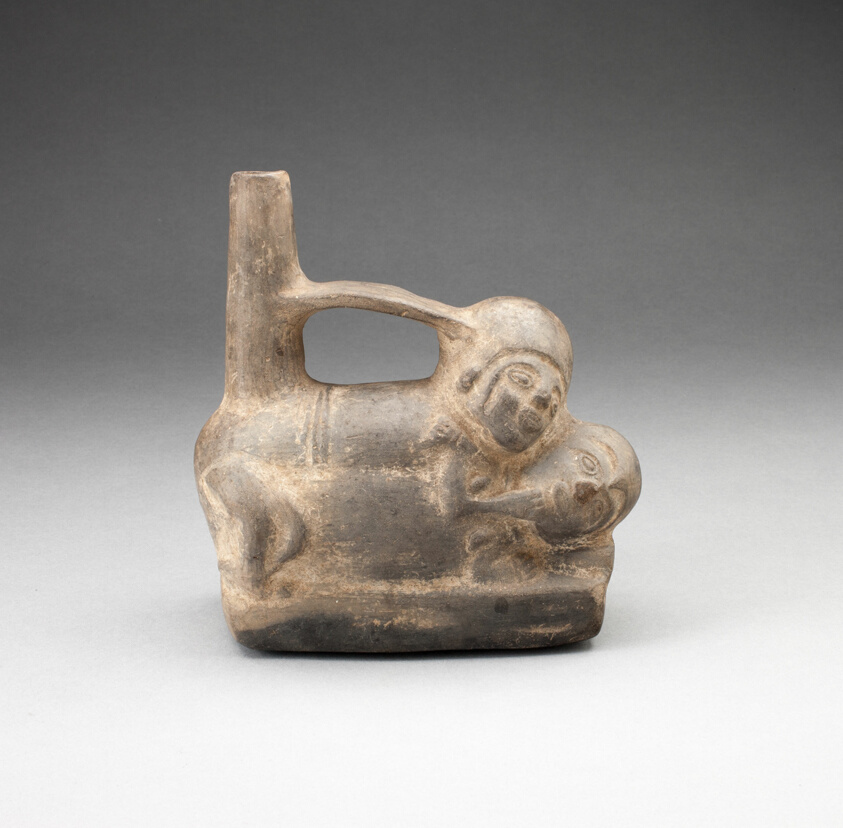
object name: Vessel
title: Stirrup Spout Vessel Depicing Erotic Scene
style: chimú, late intermediate period, Pre-Columbian, americas, Arts of the Americas, andean, andes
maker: Chimú (North coast, Peru)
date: 1100–1470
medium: Ceramic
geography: Peruvian North Coast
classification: blackware (black basaltes); earthenware; ceramics; vessel; art of the americas